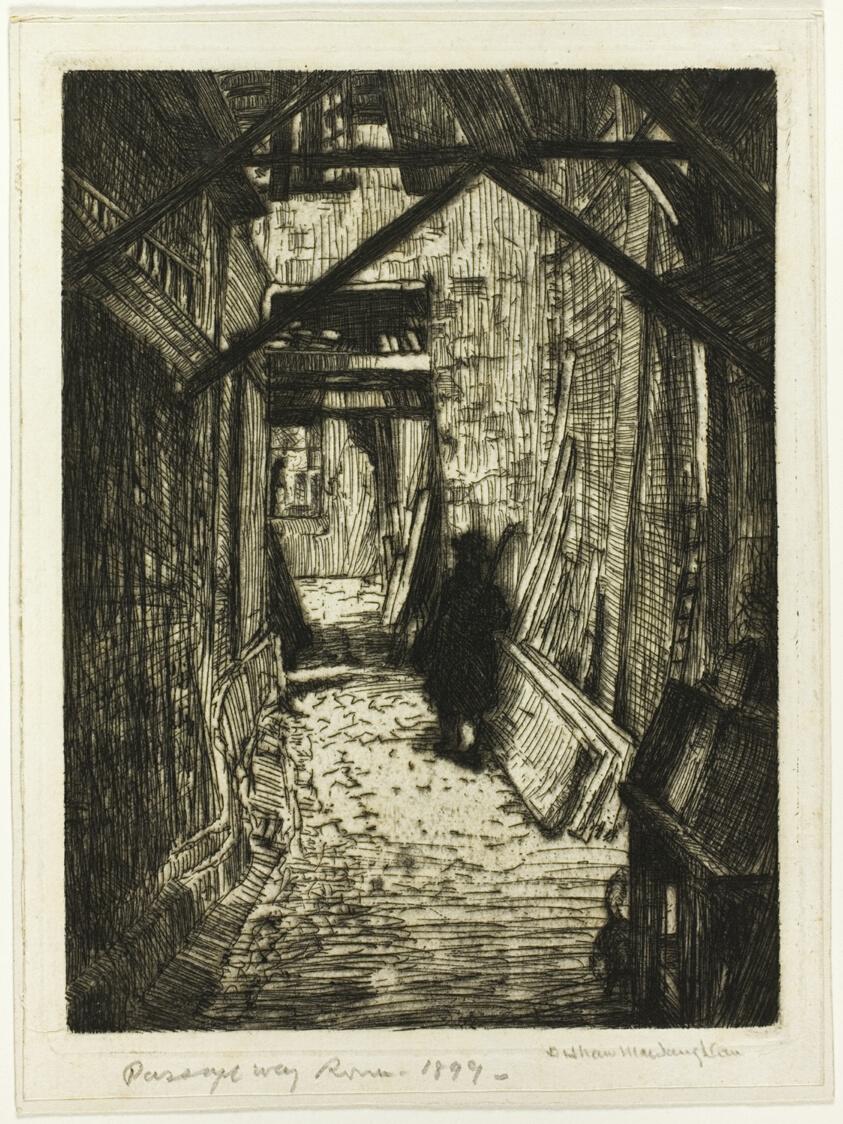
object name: Print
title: Passageway, Rouen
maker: Donald Shaw MacLaughlan (American, born Canada, 1876-1938)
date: 1899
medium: Etching in black on white wove paper, laid down on cream card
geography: United States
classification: etching; print; prints and drawing